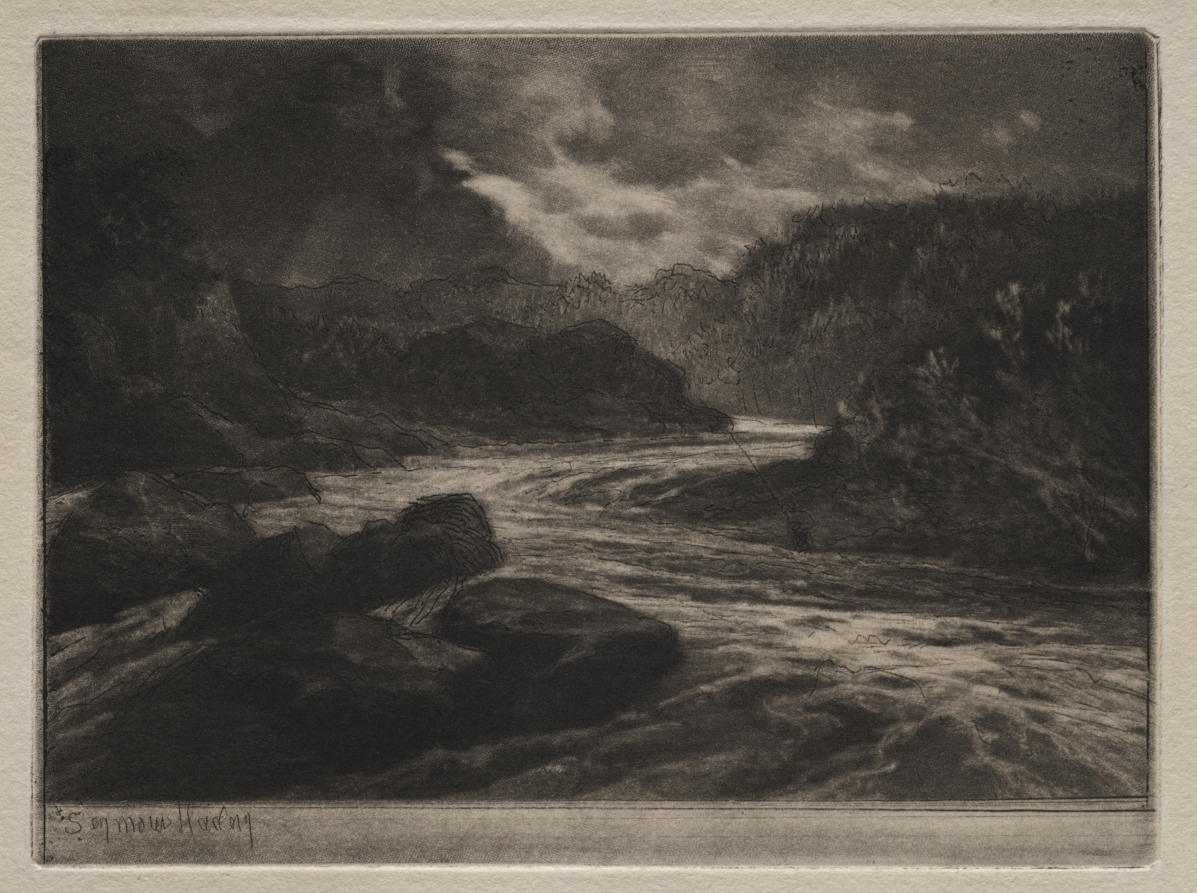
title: A Salmon River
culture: England, 19th century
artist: Francis Seymour Haden (British, 1818–1910)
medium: etching and mezzotint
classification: Print